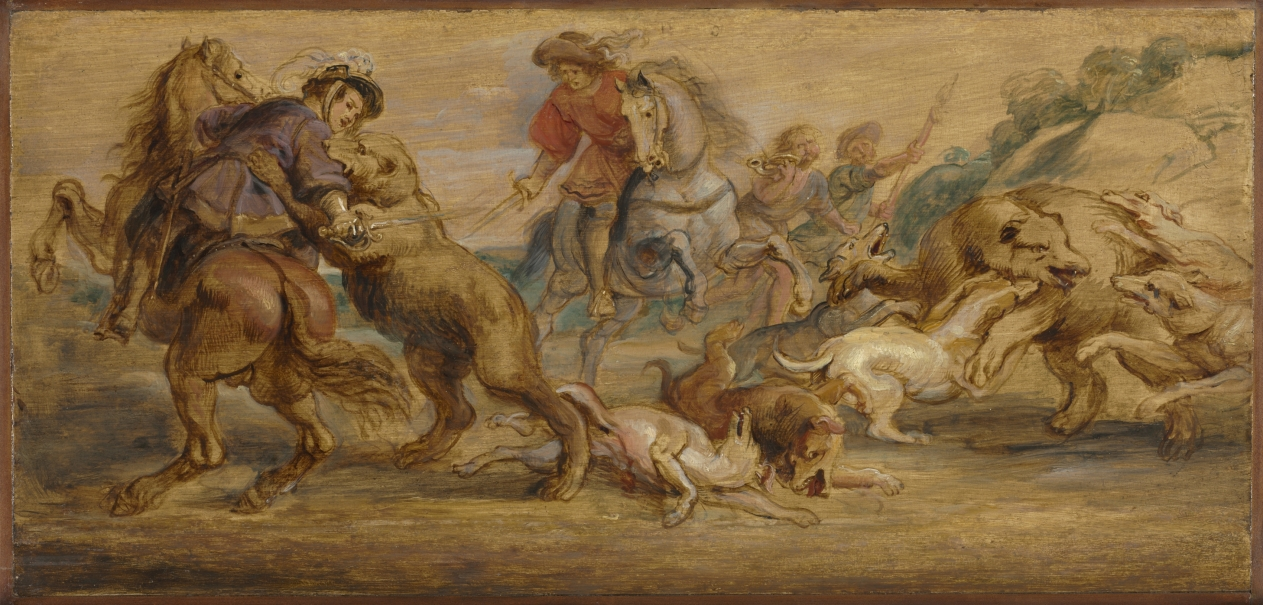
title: Study for "The Bear Hunt" (for the Alcázar, Madrid)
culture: Flanders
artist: Peter Paul Rubens (Flemish, 1577–1640)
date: c. 1639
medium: oil on wood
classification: Painting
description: On June 22, 1639, King Philip IV of Spain received a letter from his younger brother Ferdinand (1609–1641). The letter explained that the artist Peter Paul Rubens had recently completed all of the sketches for a series of paintings that were to hang in the halls of the Alcázar Palace in Madrid. Bear Hunt is one of seven surviving studies out of the original eighteen. In this scene, a bear attacks a hunter and a companion comes to his aide The others work to stave off a second angry bear. The sketch was completed in the last year Rubens's life, and the paintings for the series were never completed.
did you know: With just a few quick brushstrokes, Rubens evokes the energy and drama of a ferocious hunt.